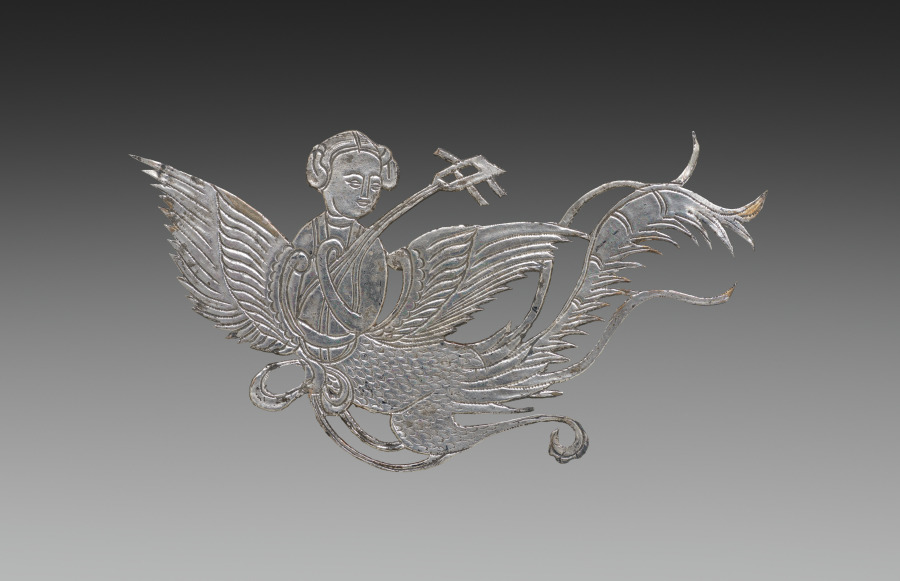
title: Inlay for a Mirror or Box: Lady and Mandolin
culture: China, Tang dynasty (618-907) - Song dynasty (960-1279)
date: c. 900–1000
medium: beaten silver with chased details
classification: Metalwork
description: The p'ing-t'o technique of inlaying gold and silver foil on lacquer produced luxurious articles of elegance and fragility. These stray silver inlays were originally mounted on a mirror back or a cosmetic box whose lacquered surface has disintegrated. They combine auspicious symbols of Indian and Chinese origin--human-headed birds whose melodies filled the Buddhist paradise, and bird-riding deities who inhabited the skies of Taoist mythology. Like these imaginary beings, the lions were probably paired in a radial design; at least one has been lost.